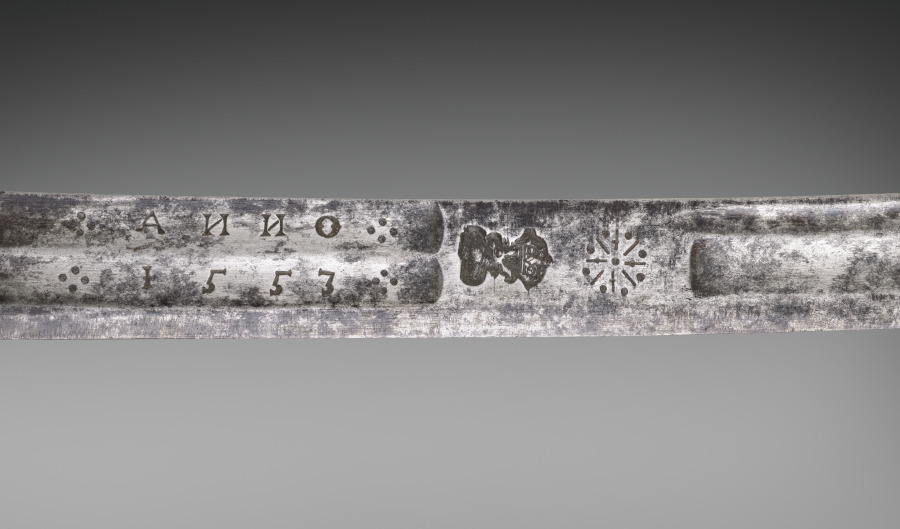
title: Hanger (Hunting Sword)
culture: Hilt: Italy (?); Blade: Germany, Saxony, late 16th-17th Century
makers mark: Jaspar Bongen the Younger (German, active late 1600s)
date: late 1600s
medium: steel; gold and silver damascened hilt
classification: Arms and Armor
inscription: "1553" (Presumed to be a commemorative date)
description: Damascening, the technique of hammering gold and silver wires into grooves cut to receive them, enlivens this sword's hilt. Further texture was added with wires to improve the user's grip, which allowed him to hunt with more control and accuracy. Hunting was a popular sport among the wealthy and many nobles owned tracts of forest, but peasants were prohibited from hunting on these lands.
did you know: The swordsmith's mark, a crowned stag visible on the blade below the hilt, is unidentified.